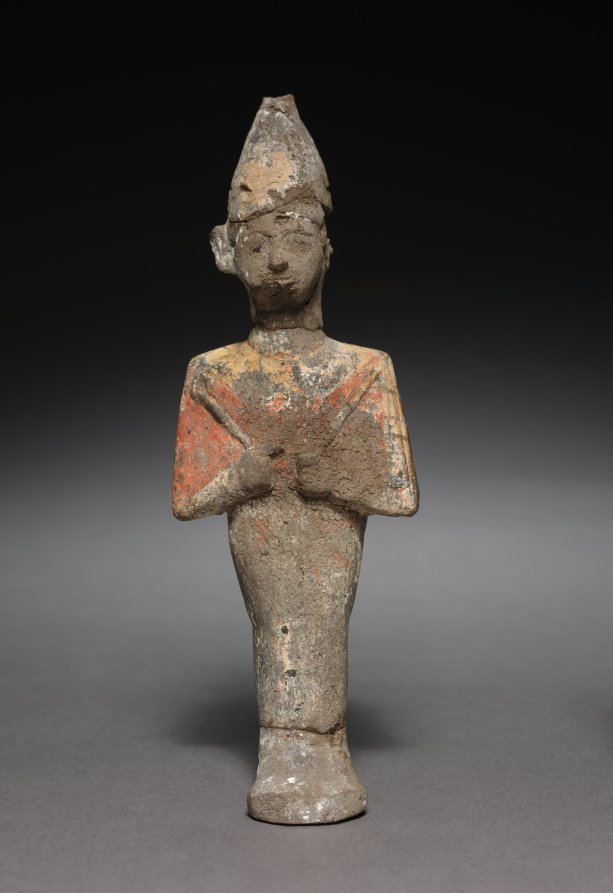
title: Statuette of Osiris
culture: Egypt, New Kingdom (1540–1069 BCE), Dynasties 19–20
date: 1295–1069 BCE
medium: painted terracotta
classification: Funerary Equipment